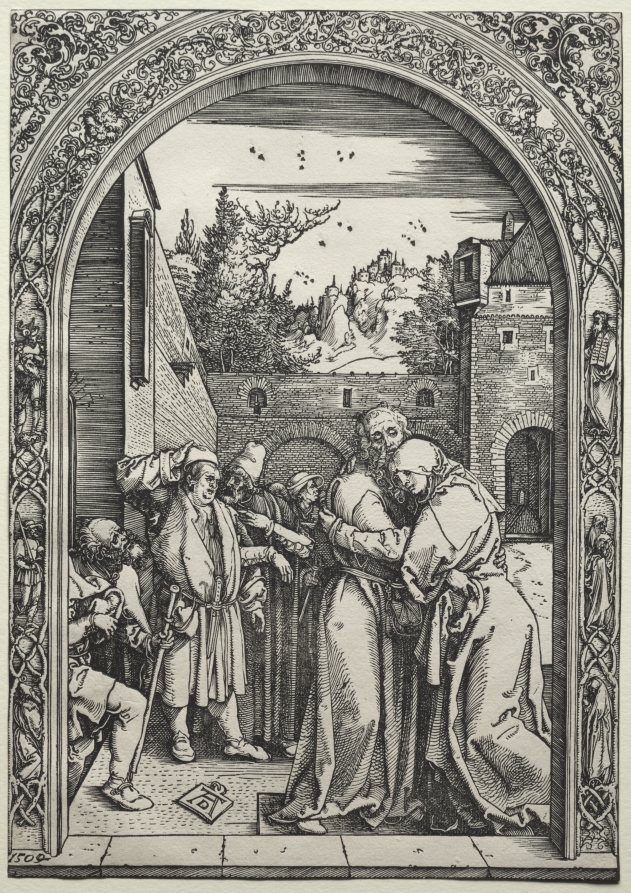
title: The Meeting of Joachim and Anna at the Golden Gate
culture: Germany, early 16th Century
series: The Life of the Virgin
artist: Albrecht Dürer (German, 1471–1528)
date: 1504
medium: woodcut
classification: Print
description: The first three woodcuts of Dürer’s narrative (1959.99.2-4) portray the events leading up to the Virgin’s birth. According to an apocryphal text, Mary’s parents, Joachim and Anna, had remained childless into old age. After Joachim’s offering at the temple was rejected for this reason, the angel Gabriel appeared to him in the wilderness to announce that his wife would soon bear a child. At this news, the two tenderly embraced at the city’s gate.